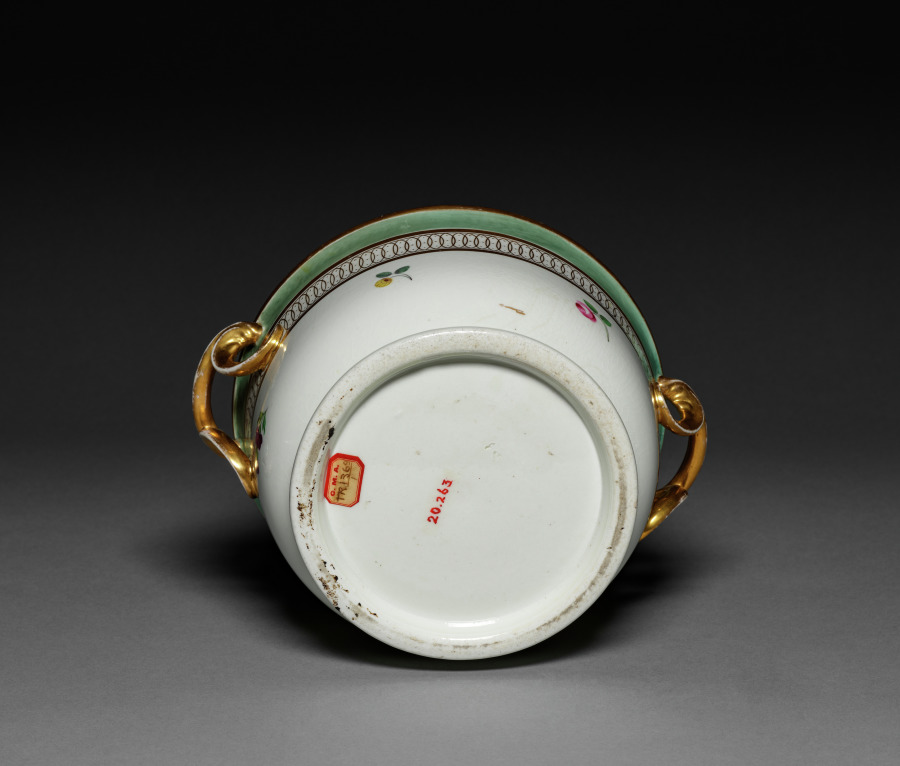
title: Ice Pail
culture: England, Derby, 18th-19th century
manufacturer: Derby (Crown Derby Period) (British)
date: c. 1795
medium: porcelain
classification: Ceramic